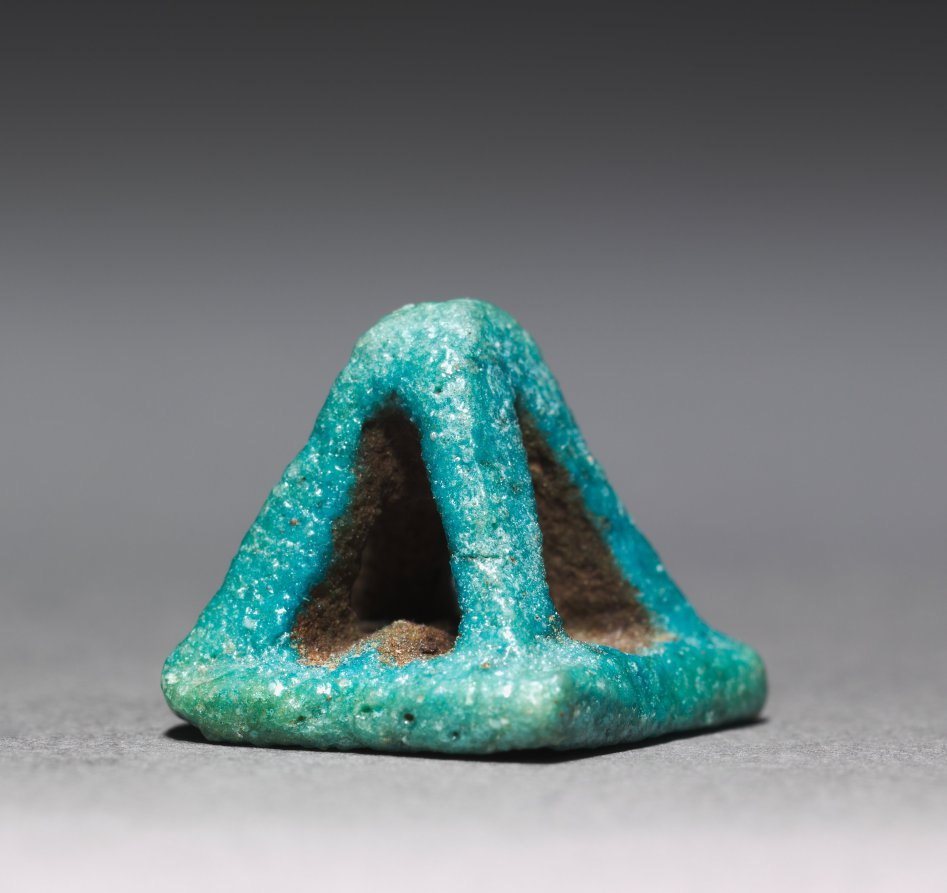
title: Stamp-Seal Amulet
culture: Egypt, Late period (715–332 BCE), Dynasty 26 or later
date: 664–525 BCE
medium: turquoise blue faience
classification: Amulets